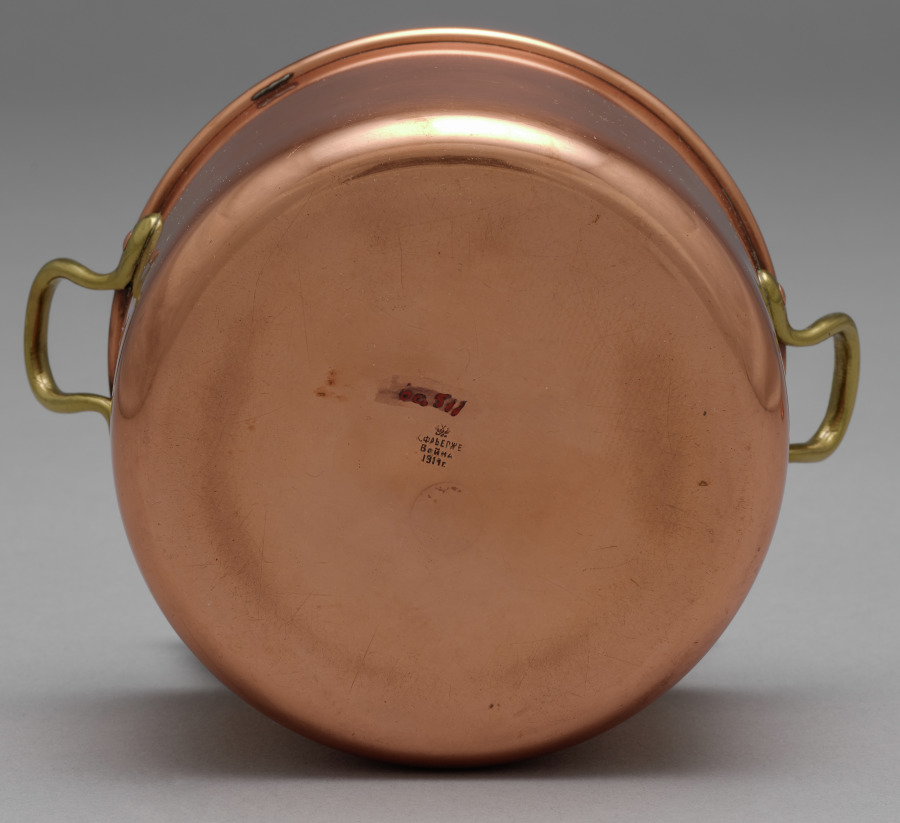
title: Pot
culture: Russia, St. Petersburg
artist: firm of Peter Carl Fabergé (Russian, 1846–1920)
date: 1914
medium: copper with brass handles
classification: Metalwork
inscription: inscribed: War (in Cyrillic), 1914r.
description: As Russia entered the First World War, austerity and economy settled into the fabric of life even among wealthy aristocrats and nobility. Not only were precious materials such as gold, silver, and gemstones hard to procure, but such luxury seemed out of place when so many men were dying at the front. Fabergé contributed to the war effort by making shells, casings, and other munitions out of brass and copper. He also made cookware, such as this small soup pot, to be sent to the front lines with provisions tucked inside. However, these simple forms only looked affordable. They were still a luxury only the wealthiest families could afford to send to their sons.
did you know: This copper soup pot was sent to the front lines filled with provisions during the First World War.